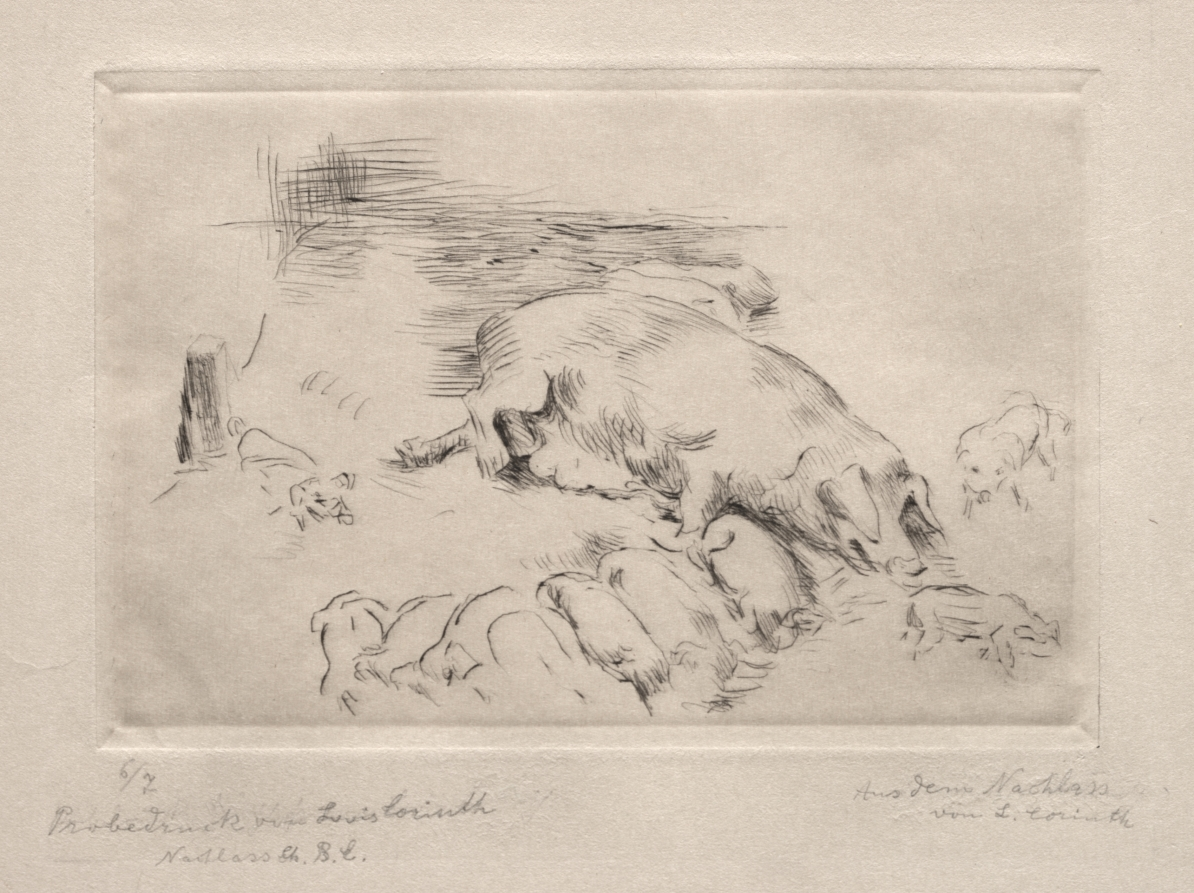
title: Sows and Piglets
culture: Germany, 20th century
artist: Lovis Corinth (German, 1858–1925)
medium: drypoint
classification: Print